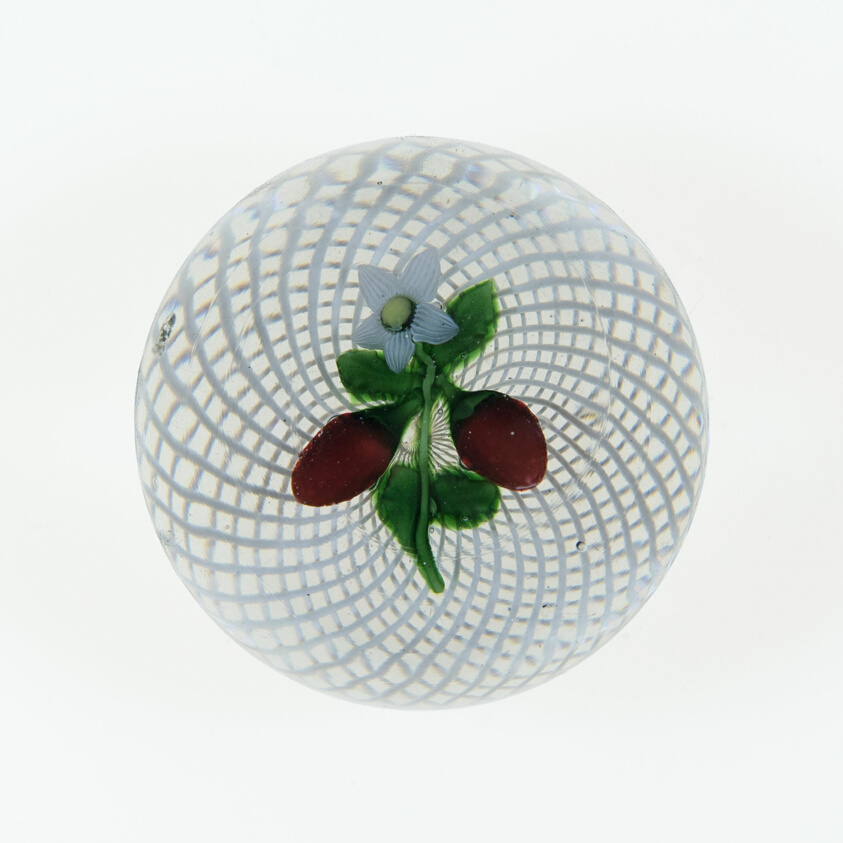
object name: Glass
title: Paperweight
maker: Saint-Louis Glassworks (Cristalleries de Saint-Louis); Lorraine, France, founded 1586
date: c. 1848–55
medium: Glass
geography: Saint-Louis-lès-Bitche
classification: paperweight; lampwork; european decorative arts; glass